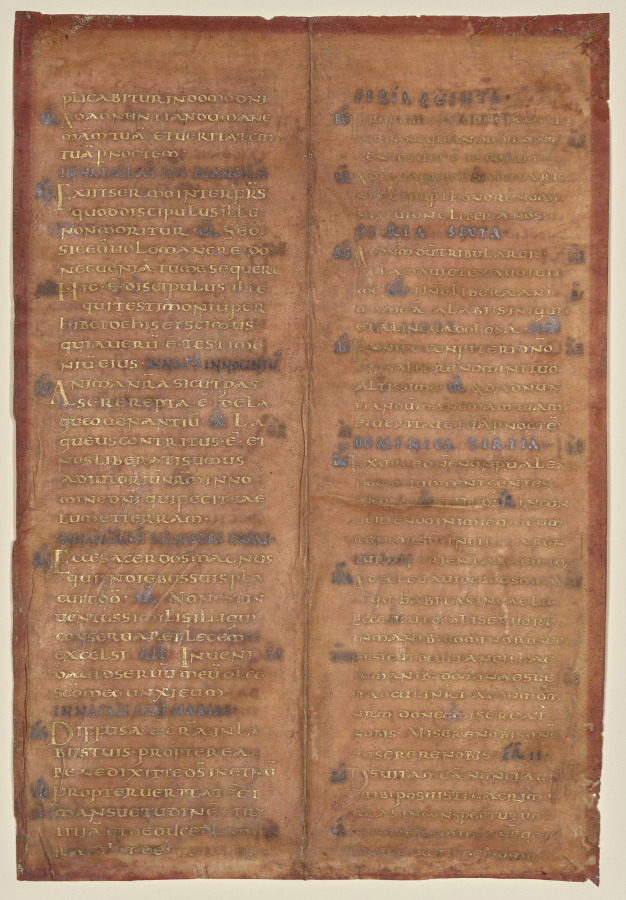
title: Bifolium Excised from a Carolingian Gradual (recto)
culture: Germany or Northeastern France, 9th century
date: c. 830–60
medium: gold and silver ink on purple parchment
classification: Manuscript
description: This rare leaf comes from a cantatorium or gradual, a book containing the chants to be sung during the Mass. Other leaves from the same book survive in Berlin and Trier. A bifolium, or double-leaf, does not contain decorated letters but rather "emphasized" letters. These were enlarged and pushed out into the margins to call attention to the eye. Such emphasized letters originated in late classical times and were the precursor to the decorated initial developed by medieval scribes. The purple-stained vellum (now faded to a deep pink) with its text written in gold and silver inks (now turned black) suggested great luxury with its sumptuous appearance. In Mediterranean regions, the purple dye was obtained from murex, a shellfish dye. In northern Europe, plant dyes were used as an alternative. Combined with the use of gold and silver ink a spectacular appearance was achieved that is traceable back to classical antiquity.